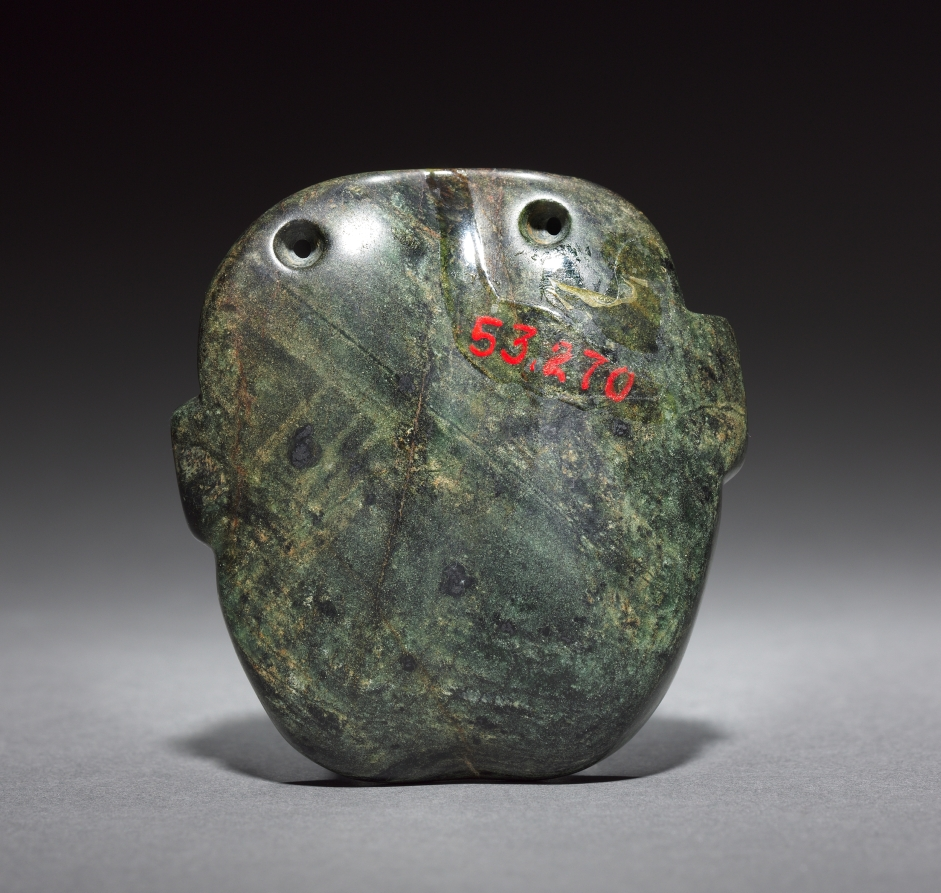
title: Pendant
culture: Mexico, Central Highlands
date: 1–900 CE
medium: jade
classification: Jade